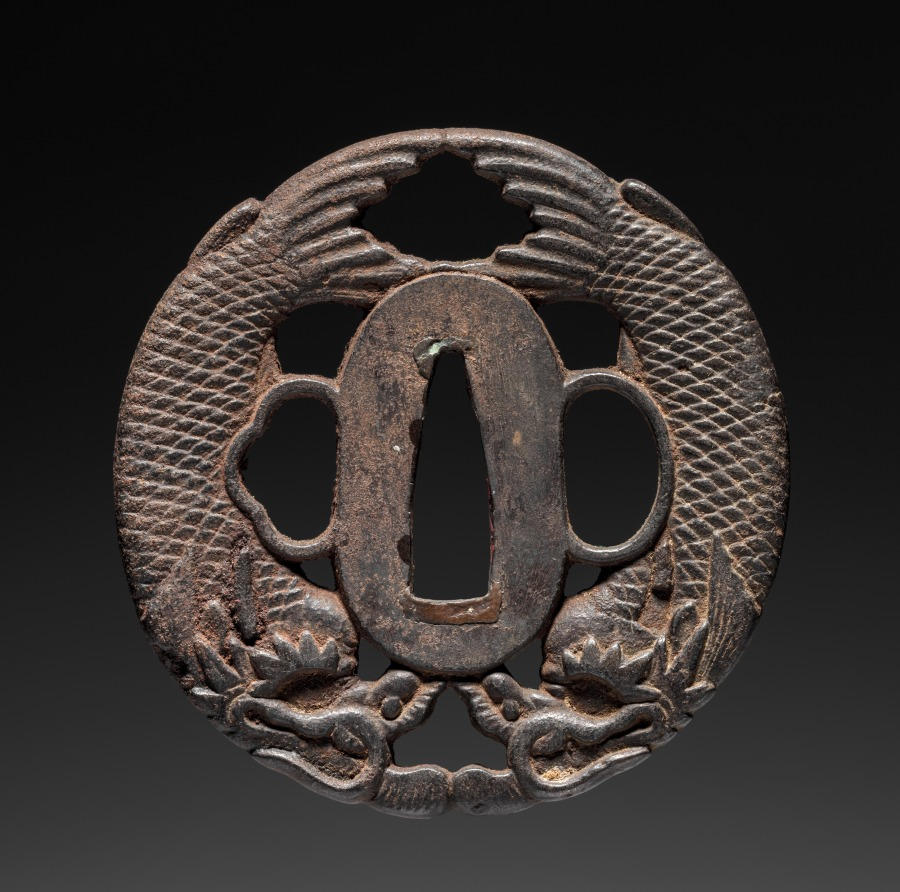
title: Sword Guard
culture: Japan, Edo period (1615–1868)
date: c. 1800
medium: iron (Choshu type)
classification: Arms and Armor